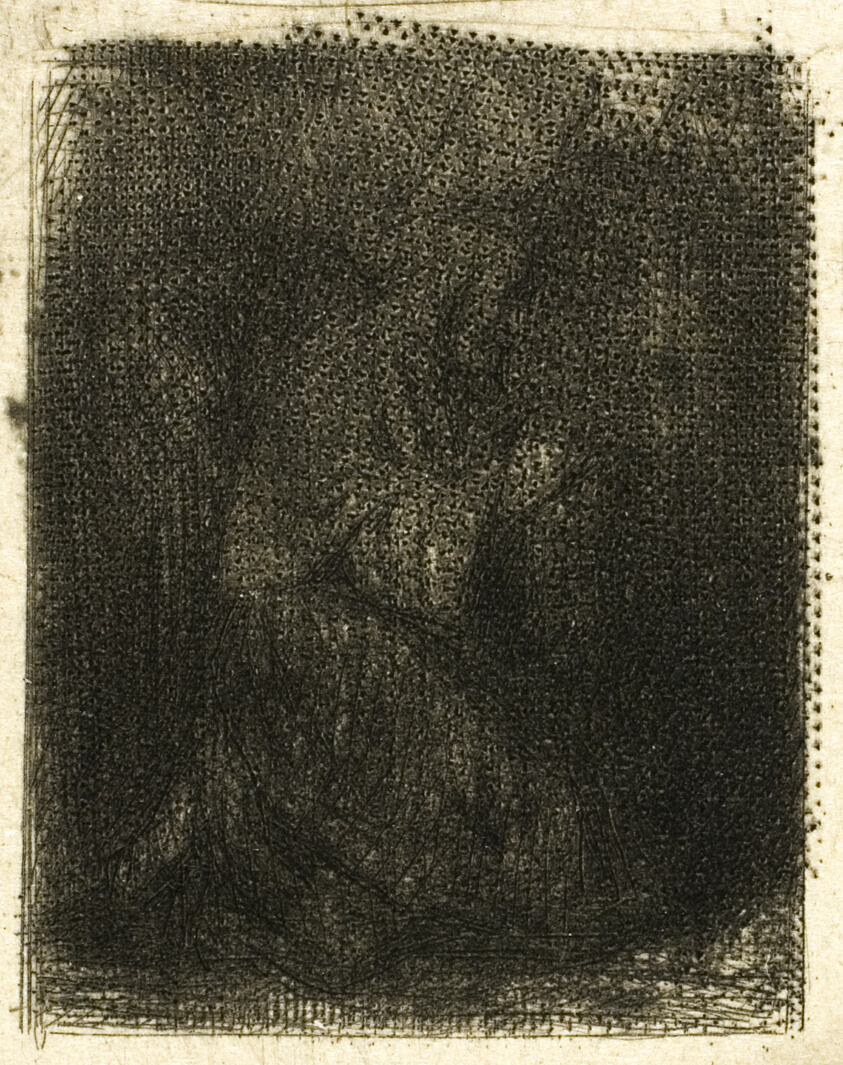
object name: Print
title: Monk at Prayer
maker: Charles Émile Jacque (French, 1813-1894)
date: c. 1843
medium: Drypoint and roulette on ivory wove paper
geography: France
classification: drypoint; print; prints and drawing